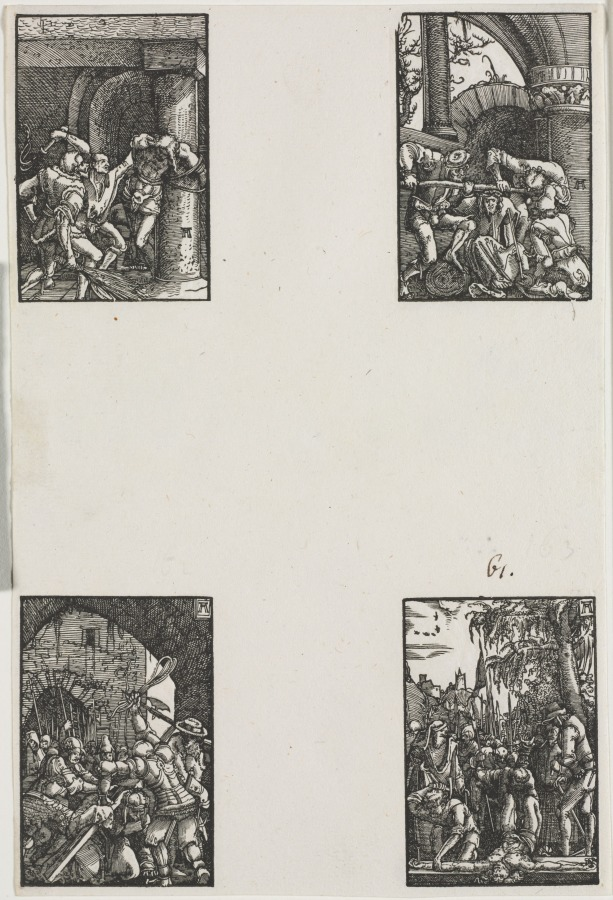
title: The Fall and Redemption of Man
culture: Germany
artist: Albrecht Altdorfer (German, c. 1480–1538)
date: c. 1515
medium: woodcut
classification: Print